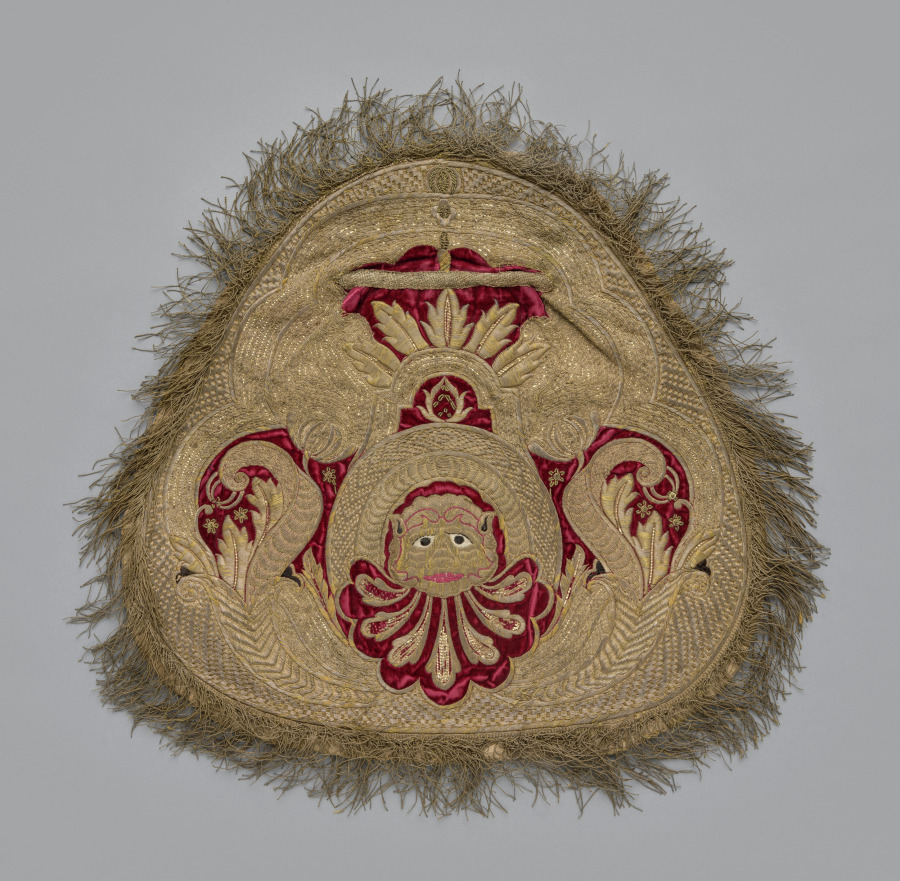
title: Gold Embroidered Pistol Cover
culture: Spain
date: 1700s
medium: embroidery; gold metallic thread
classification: Embroidery